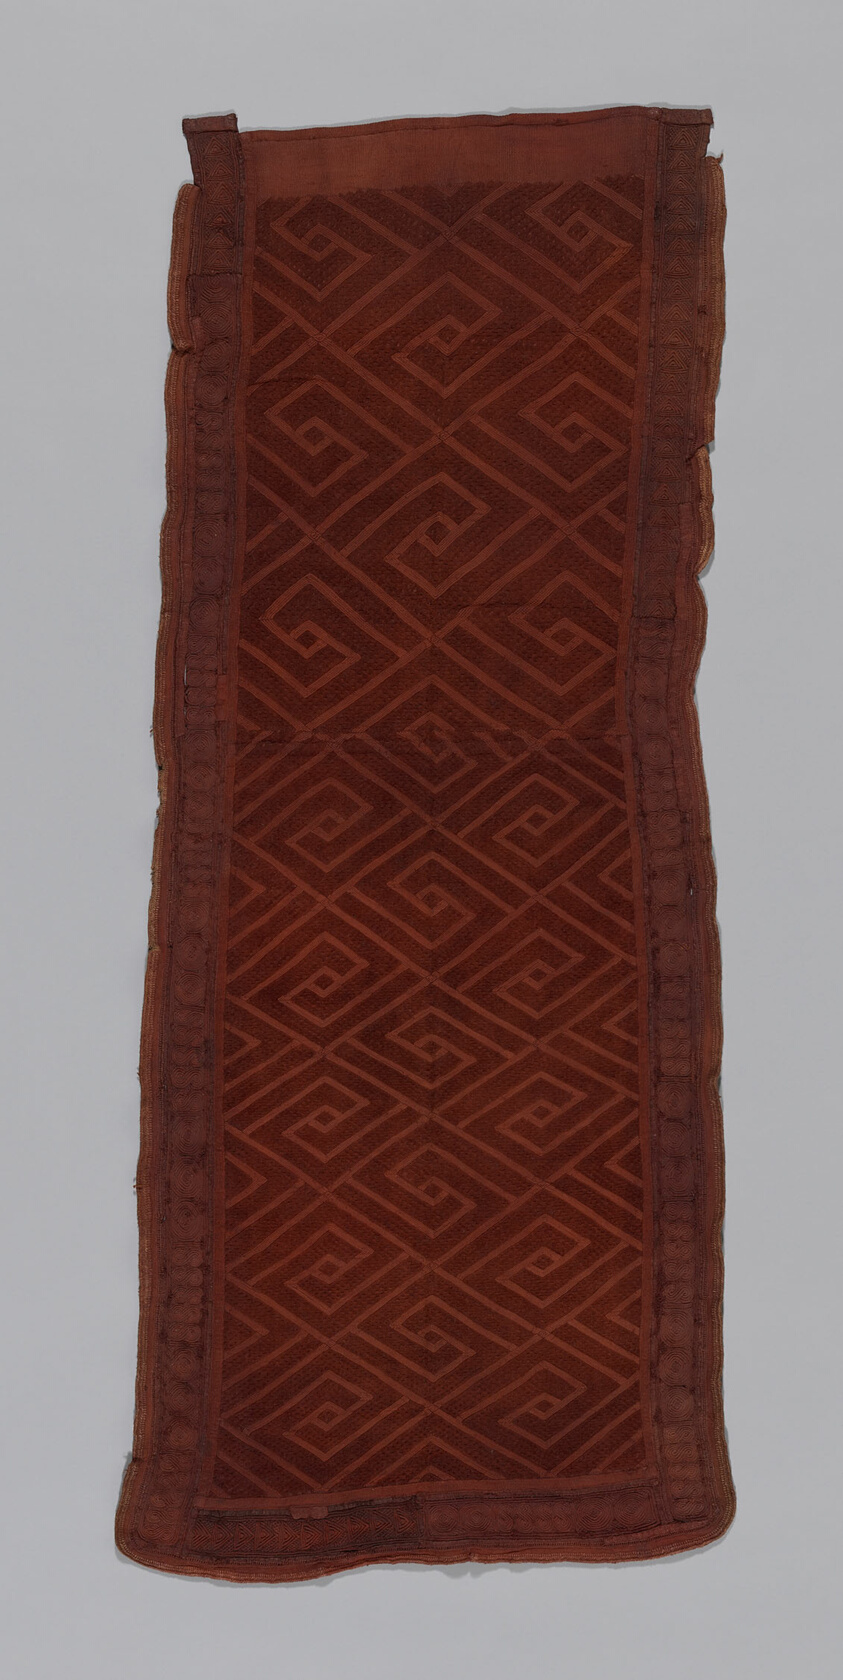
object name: Costume and Accessories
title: Woman's Overskirt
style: kuba kingdom, Arts of Africa, african, kuba (democratic republic of congo style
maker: Kuba, Bushong; Democratic Republic of the Congo, Mushenge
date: 19th century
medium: Raffia, plain weave; pieced; embroidered in lateral looping, and stem and running stitches cut to form pile; couching; joined by pearl and trammed twisted buttonhole stitches; edged in lateral looping stitches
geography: Democratic Republic of the Congo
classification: textile; needlework (visual works); arts of Africa; costume; dress (garment); clothing